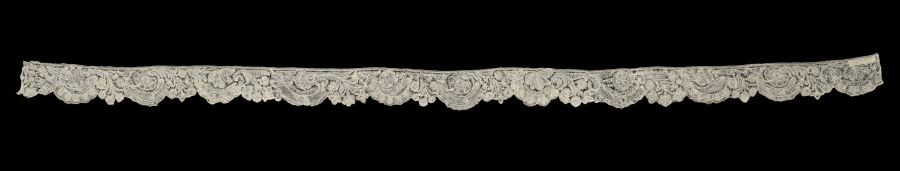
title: Lace Edging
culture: England, Devonshire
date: 1740–60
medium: Bobbin lace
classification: Lace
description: Although made in Great Britain, this lace copies Brussels' Point d'Angleterre lace.